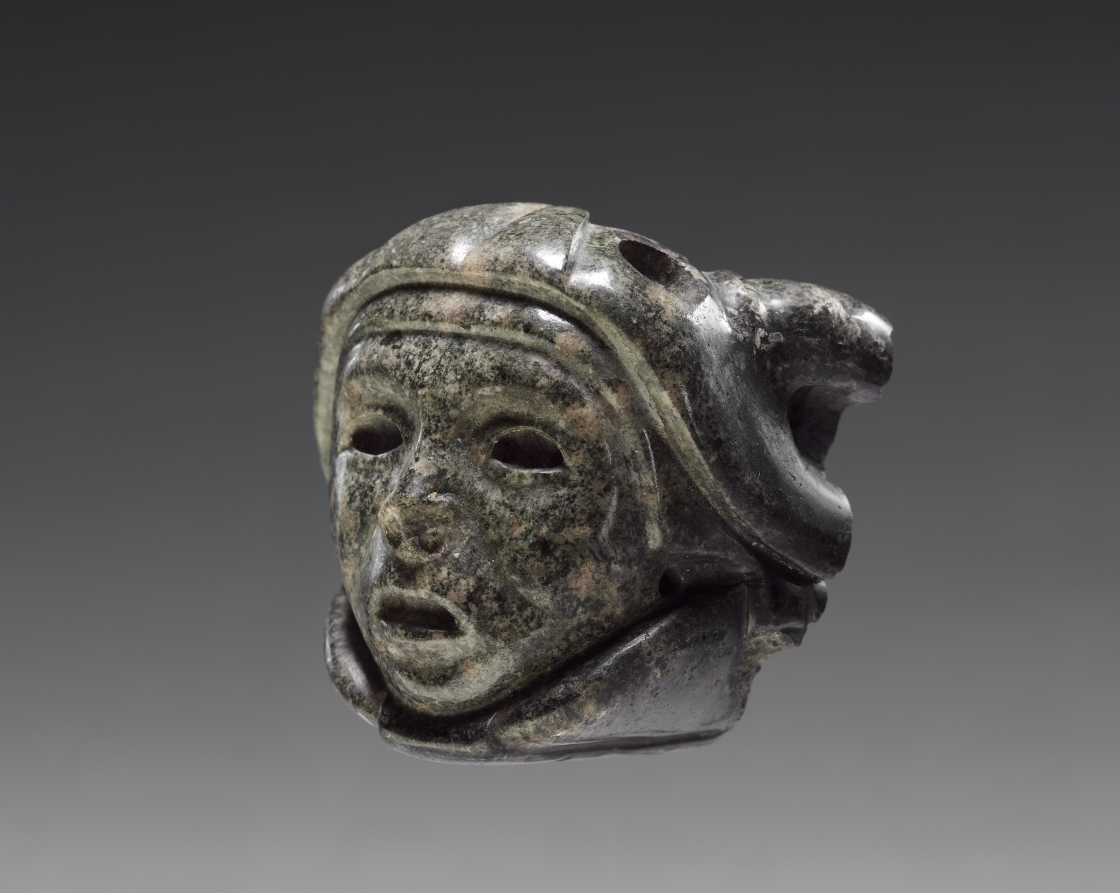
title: Head in Mouth of Snake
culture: Central Mexico, Aztec, Post-Classic Period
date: 1325–1519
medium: greenstone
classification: Stone